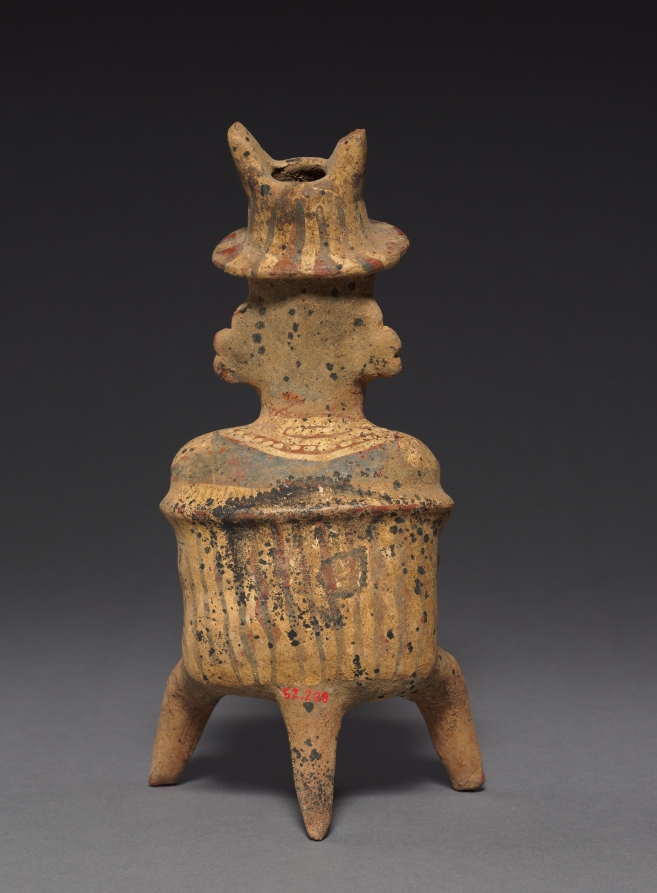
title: Seated Male Holding Chief’s Baton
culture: Mesoamerica, West Mexico, Nayarit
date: 200 BCE–300 CE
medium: ceramic, pigment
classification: Ceramic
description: The ancient artists of West Mexico specialized in ceramic sculptures in a range of sizes, investing their creations with a warm humanity regardless of scale. This tripod-shaped figure represents a well-dressed chief holding a baton of authority.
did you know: This tripod-shaped figure represents a well-dressed chief holding a baton of authority.